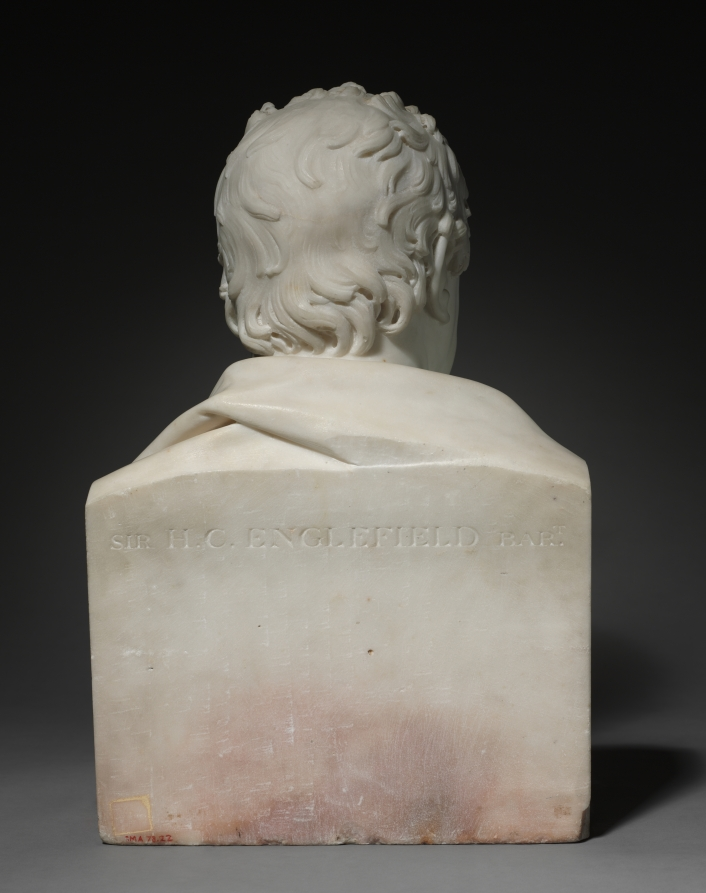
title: Sir H. C. Englefield, Bart.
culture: England, 19th century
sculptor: Francis Legatt Chantrey (British, 1781–1841)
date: 1818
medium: marble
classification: Sculpture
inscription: inscribed left side: Chantrey/Sculptor/1818; rear: Sir H. C. Englefield, Bart.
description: To modern eyes, a bare-chested portrait of a man in his mid-60s might seem undignified. However, it was fashionable for gentlemen of Englefield’s generation to be portrayed in this manner, deliberately referencing the antique sculptures of Roman statesmen they admired. As a Catholic, Englefield was barred from taking part in politics in England; however, he was a member of several clubs devoted to the amateur study of art, science, and history. Among these were the Society of Dilettanti, which championed the works of antiquity and promoted the creation of modern art in the same spirit—like this marble bust by celebrated sculptor Francis Legatt Chantrey.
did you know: Initially, Chantrey tried to establish himself as a portrait painter. After 1805, he painted only on occasion and from 1811–20, he became the leading portrait sculptor in Regency Era Great Britain.